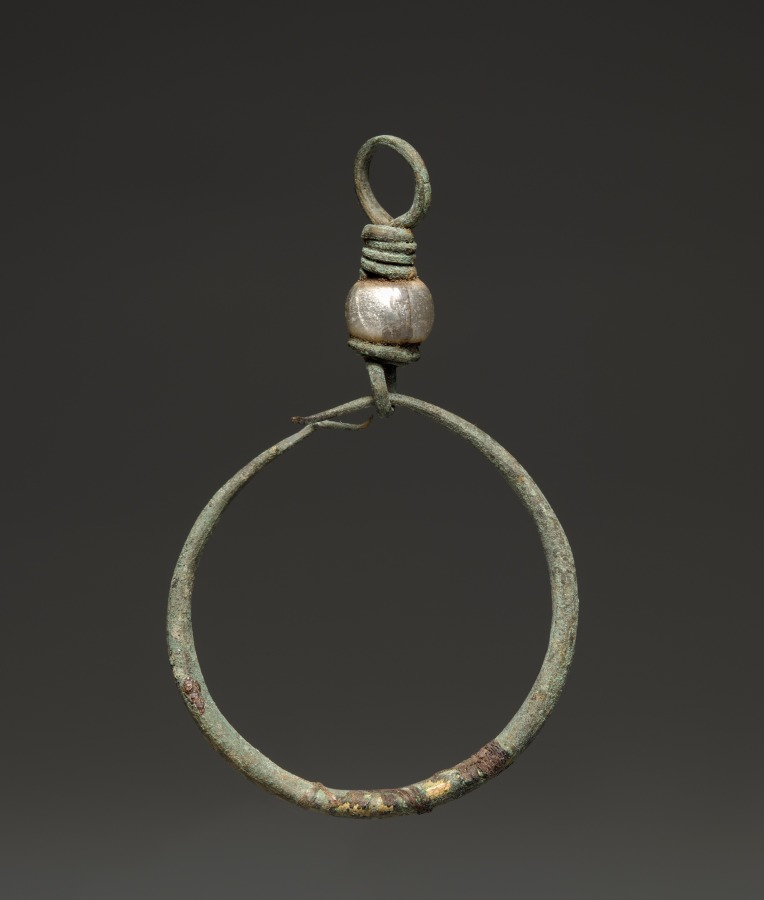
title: Earring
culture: Egypt, Greco-Roman period (332 BCE–395 CE), Roman empire (30 BCE–395 CE)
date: 200–400 CE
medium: bronze and glass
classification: Jewelry